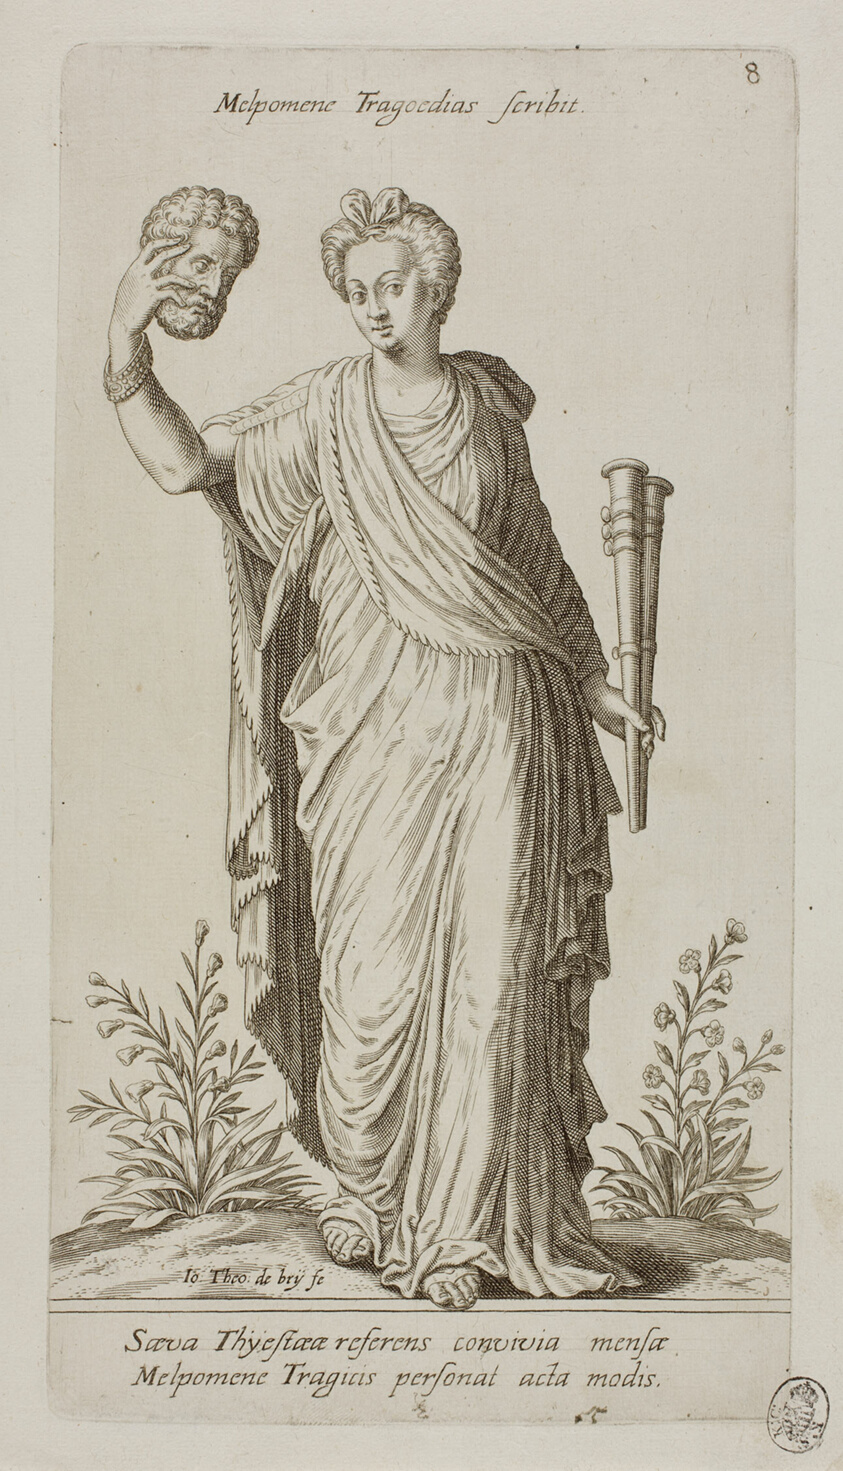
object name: Print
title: Melpomene, Muse of Tragedy, plate 8 from Parnassus Biceps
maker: Johann Theodor de Bry (German, 1561-1623); after Jean-Jacques Boissard (French, 1533-1598)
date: 1601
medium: Engraving in black on ivory laid paper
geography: Frankfurt an der Oder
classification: engraving; print; prints and drawing